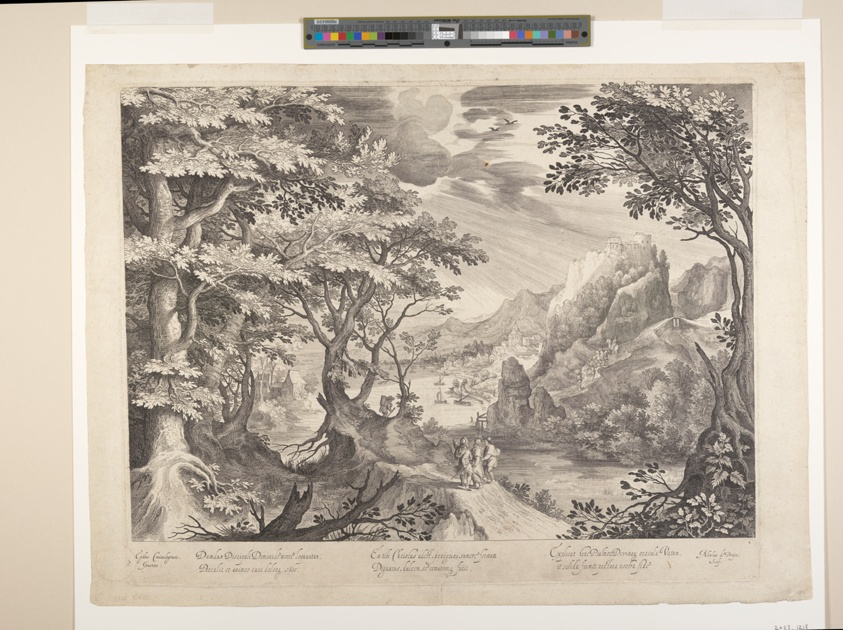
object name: Print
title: The Disciples on the Way to Emmaus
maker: Nicolaes de Bruyn (Flemish, 1571–1656); after Gillis van Conixloo (Flemish, 1544–1606)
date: c. 1601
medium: Engraving on ivory laid paper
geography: Flanders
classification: engraving; paper; print; prints and drawing